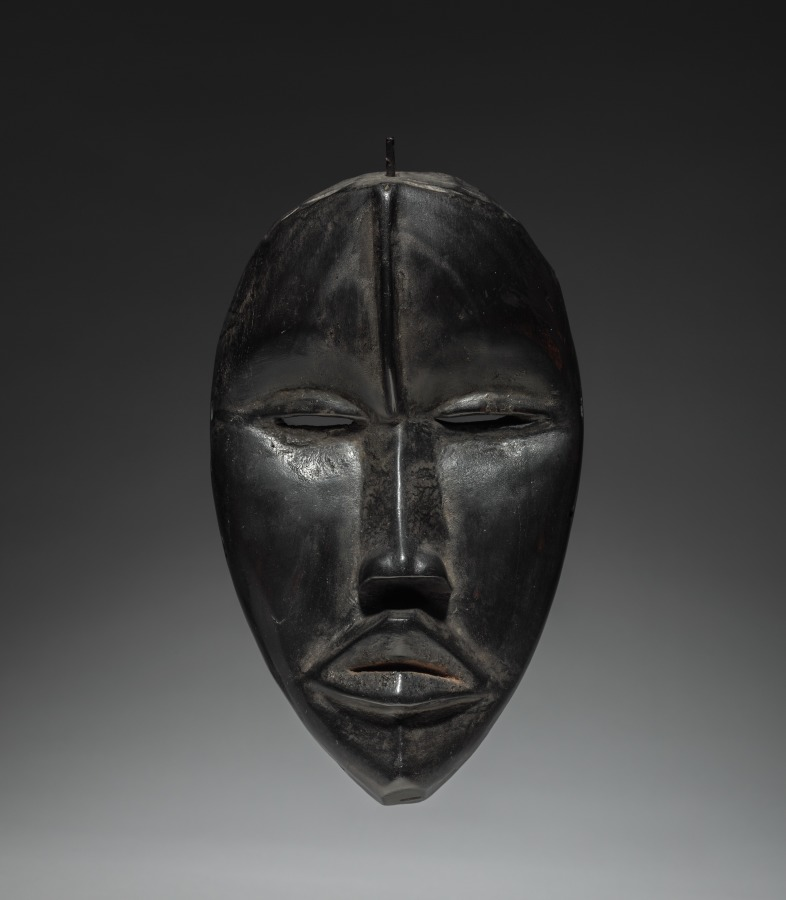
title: Mask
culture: Africa, West Africa, Liberia, Dan-style maker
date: c. 1900s?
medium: Wood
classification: Mask